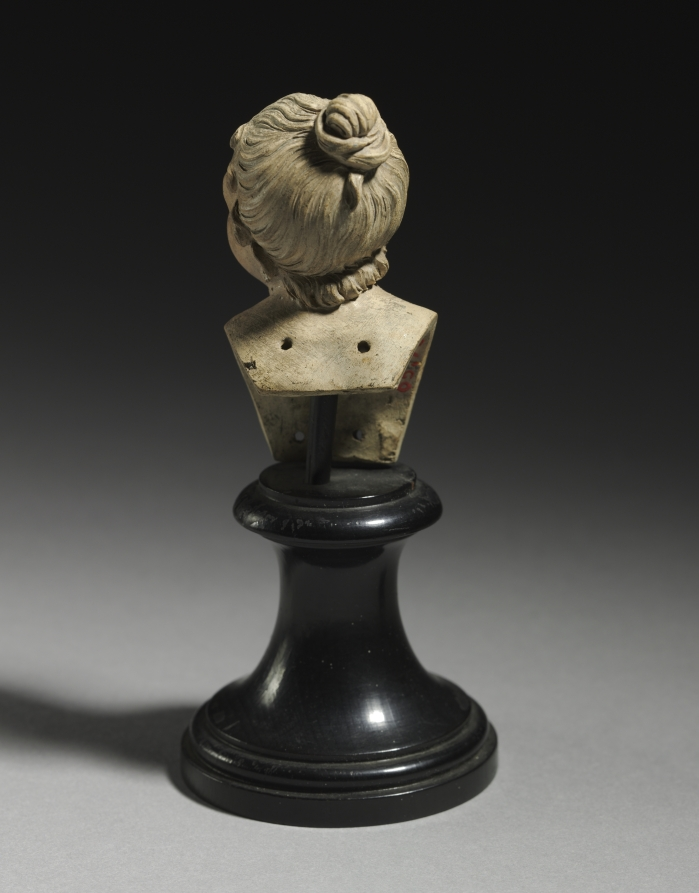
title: Head of a Woman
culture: Italy, Naples (?), early 19th Century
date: c. 1800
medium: terracotta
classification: Sculpture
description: Each of these miniscule terracotta busts has allegedly been formed by hand, though the precision of the detailed features implies that they have been cast from a mold. Details such as the meticulously executed facial features and the thin, exact rows of hair on each figure suggest a manufactured method of creation, yet the pair is deemed handmade. Furthermore, these figures lack any trace of fingerprints that handmade figures of this time typically bear. Small holes at the base of each bust suggest that the heads were once attached to bodies that may have been used as crèche figurines. The busts were created in Naples where large numbers of nativity scenes were produced around the turn of the nineteenth-century. The similarity in size to archetypal terracotta crèche figurines, as well as the vast production of nativities in Naples at this time lends to the possibility that these busts were created for a nativity scene.